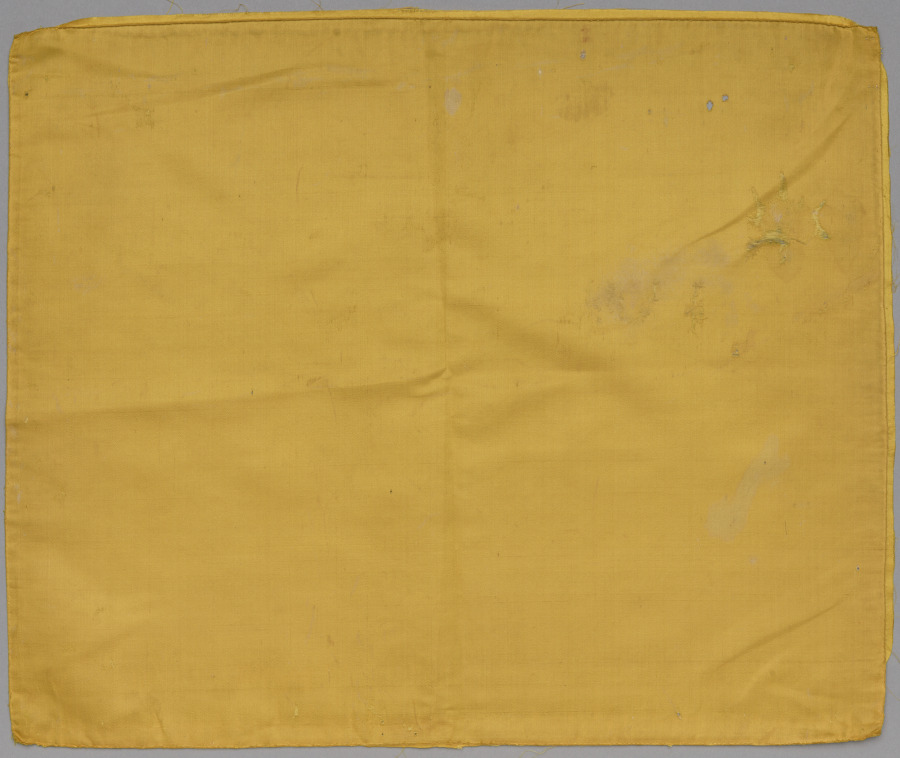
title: Cushion Cover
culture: China, Qing dynasty (1644-1911)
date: 1700s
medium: silk, metallic thread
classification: Textile